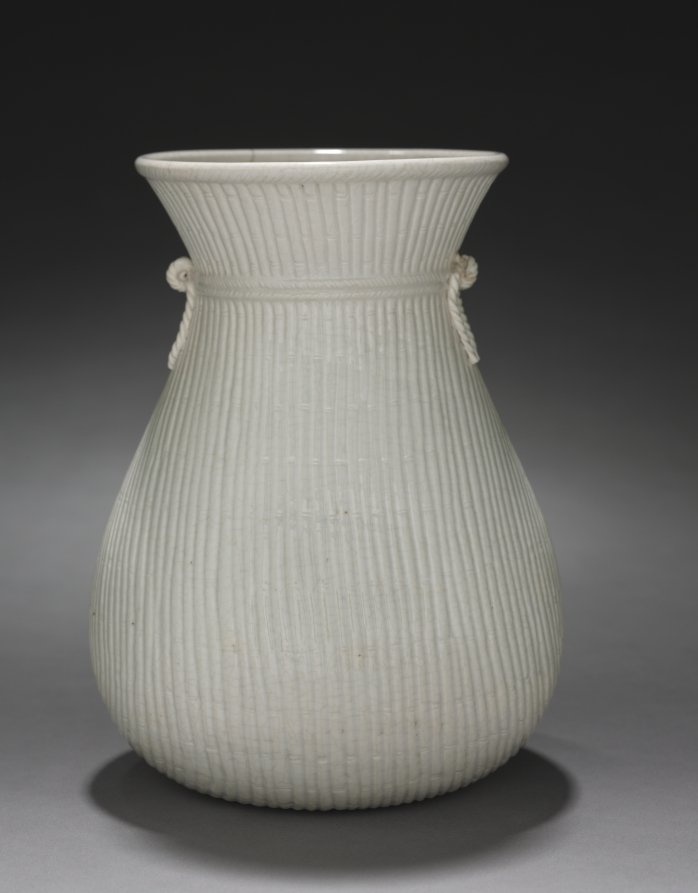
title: Basket Shaped Vase: Ding Ware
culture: China, Ming dynasty (1368–1644)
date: 1600s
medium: glazed porcelain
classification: Ceramic